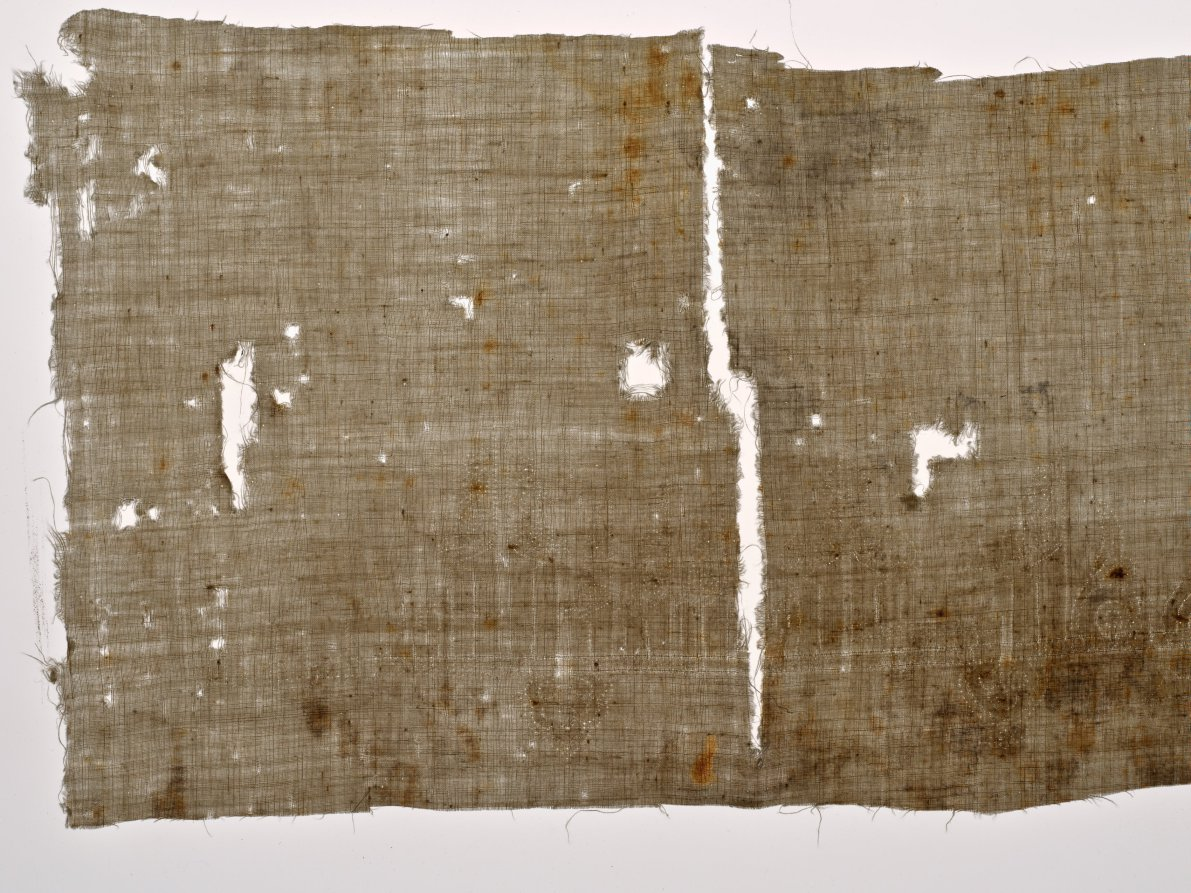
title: Tiraz of Caliph ‘Abd al-Rahman III, from the reliquary of Santa Librada, Cathedral of Seqüenza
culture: Spain, Cordoba, Spanish Umayyad period (756–1031)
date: 941–42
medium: Linen; silk: embroidery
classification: Embroidery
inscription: only the traces of a very large-scale elaborately foliated Kufic inscription preserved, largely in the form of needle holes but with a few small areas where the stitches are intact. This is approximately the second half of the original full inscription, which measured well over two meters long; the bulk of the original textile with the first half of the inscription was formerly preserved in the Cathedral of Siquenza. As preserved on the two fragments, the full inscription reads: "[Commander of the Be]lievers al-Masir li-Din al-Muslimin, may God support him! That which was made through the agency of Durri, his servant, in the year thirty and three hundred."